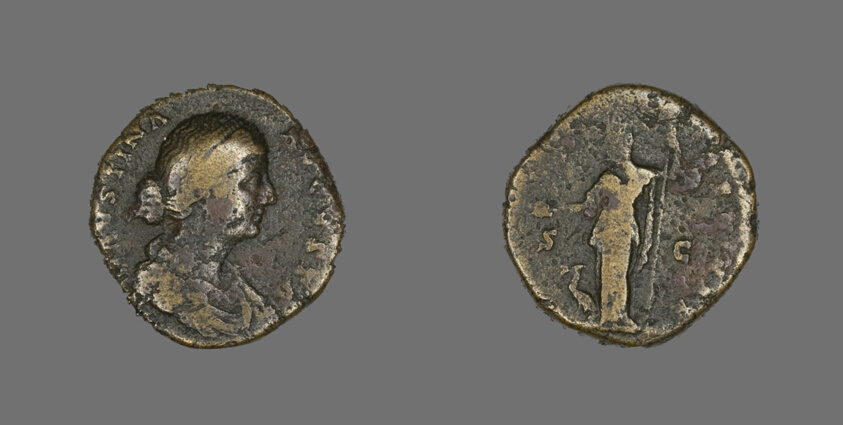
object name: Coin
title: Coin Portraying Empress Faustina the Younger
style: imperial (roman), ancient, roman (ancient, style or period)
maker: Roman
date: 161-176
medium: Bronze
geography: Roman Empire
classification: coin; struck; ancient art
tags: goddesses